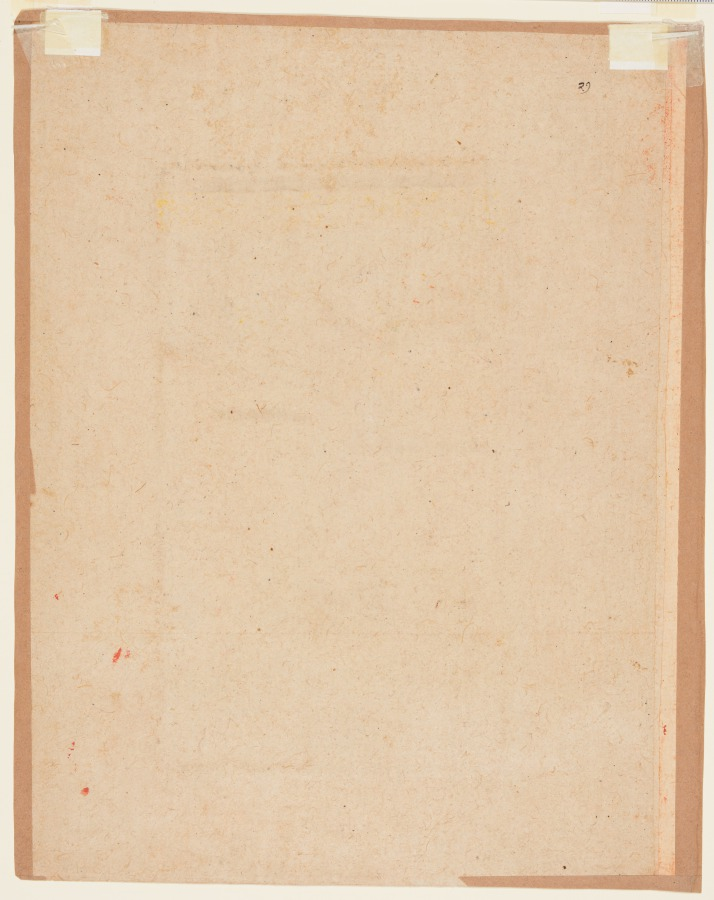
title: Woman Longing for Her Lover: Verati Ragini of Dipak, from a Ragamala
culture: Northwestern India, Rajasthan, Rajput Kingdom of Kota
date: 1650–60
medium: gum tempera, ink, gold, and silver on paper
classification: Painting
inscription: veratī rāganī. 3. 27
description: Outside an open bedchamber, a woman sits on a high stool with her arms stretched up overher head. Her attendant holds a pot of incense that will make her body and garments fragrant in anticipation of an amorous reunion. The red border with silver floral ornament is characteristic of this widely dispersed series.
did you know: A group of bumble bees surround the heroine, attracted to her perfume.